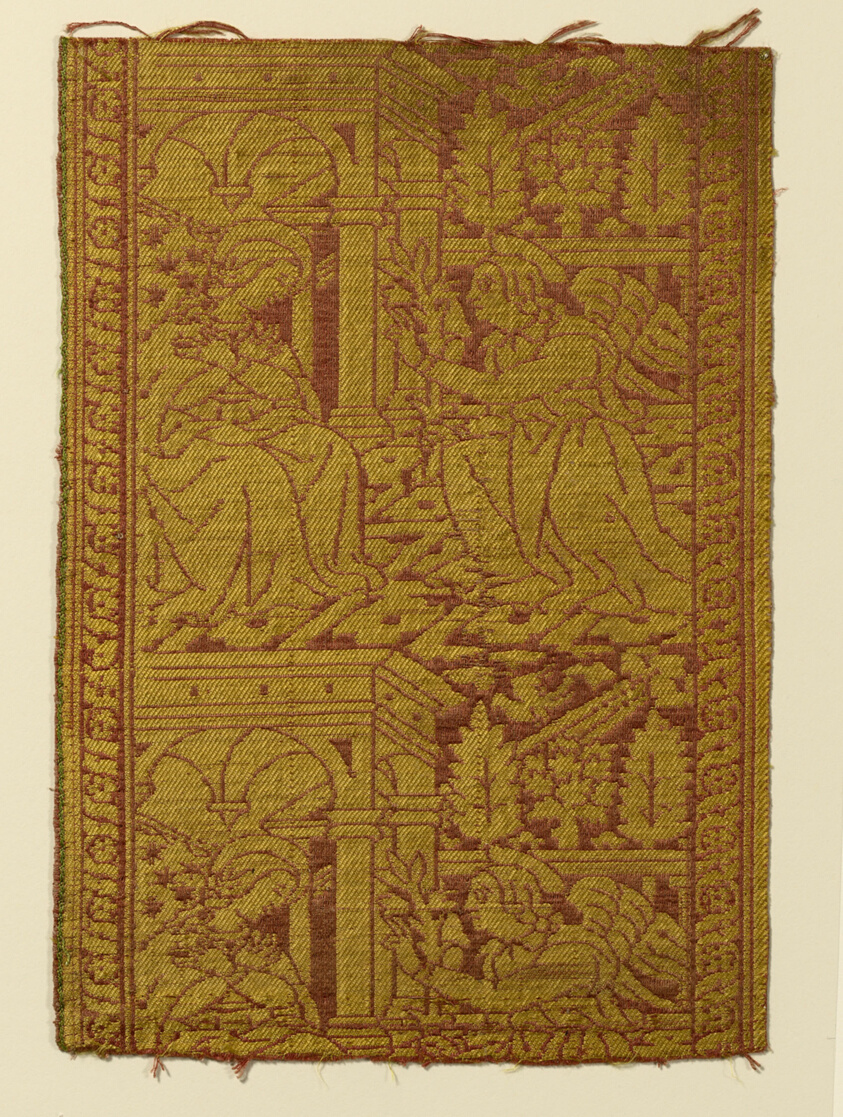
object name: Religious/Ritual Object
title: Fragment (From an Orphrey Band)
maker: Italy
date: 15th century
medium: Silk, warp-float faced 4:1 satin weave with weft-float faced 1:3 'Z' twill interlacings of secondary binding warps and supplementary patterning wefts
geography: Italy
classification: textile; weaving; liturgical; ritual objects